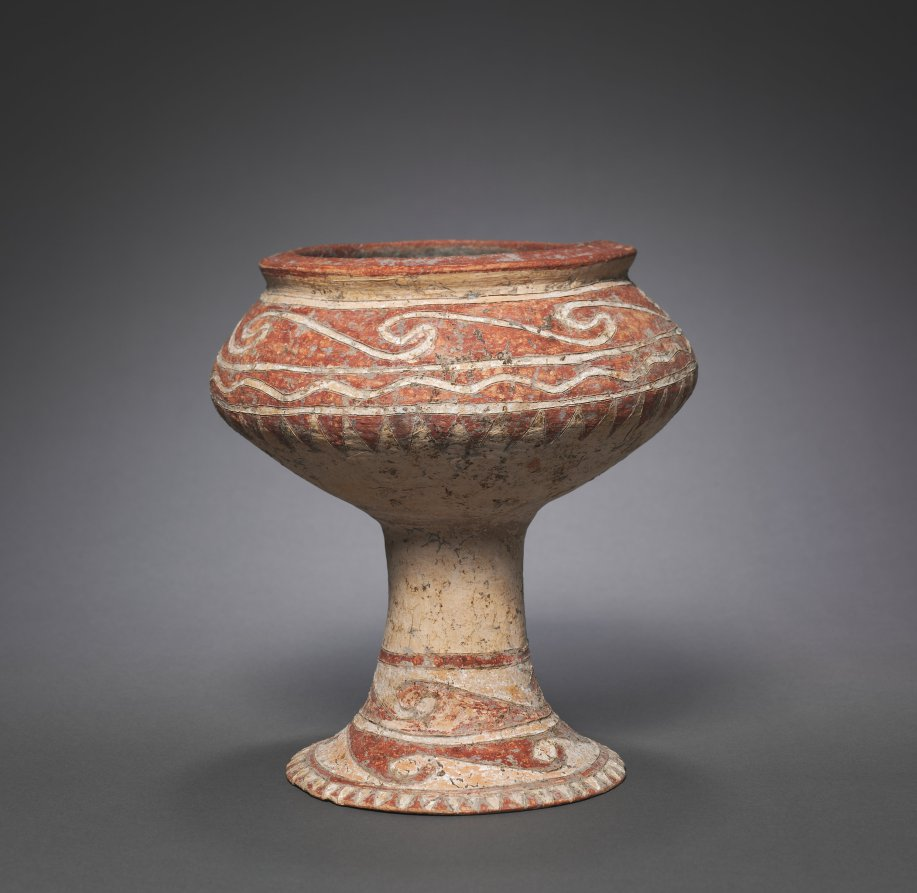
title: Tazza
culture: South East Asia, Thailand, Ban Chiang, Neolithic period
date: 3000s BCE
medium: reddish earthenware with painted and incised decoration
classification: Ceramic